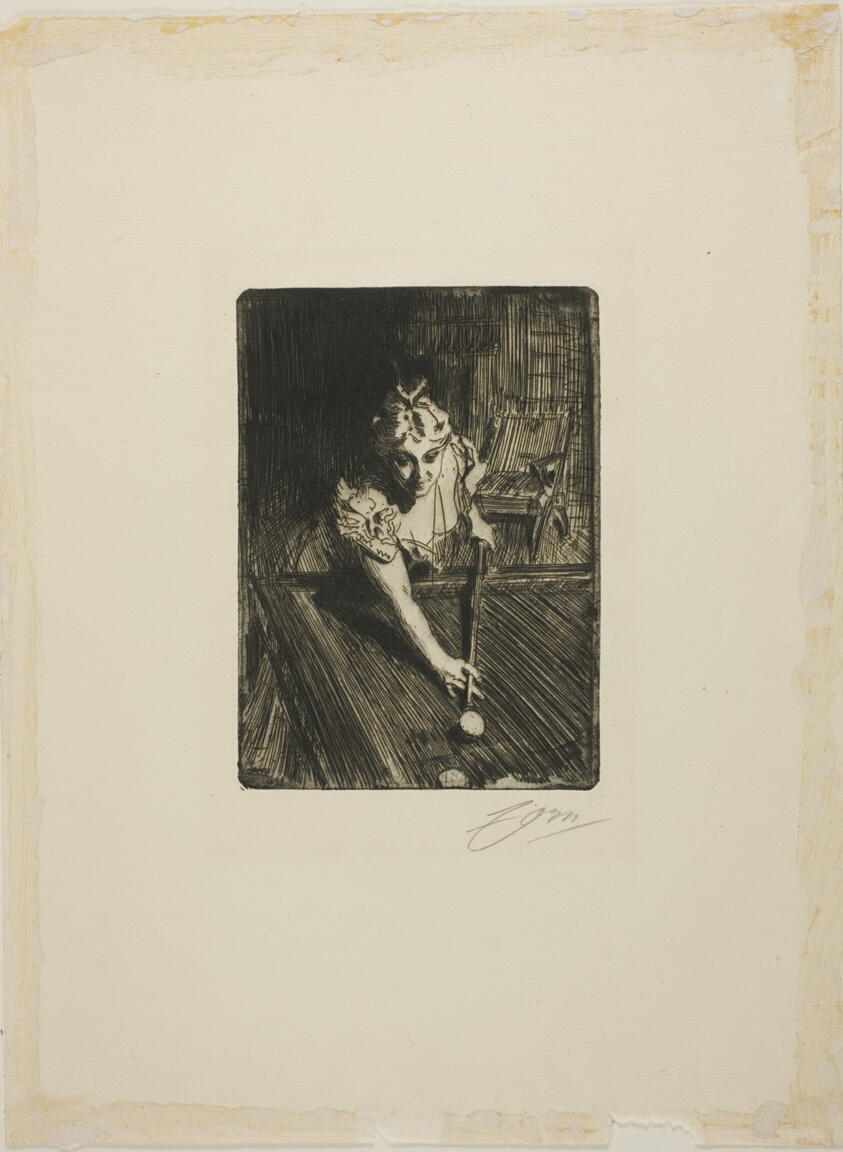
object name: Print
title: Billiards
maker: Anders Zorn (Swedish, 1860-1920)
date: 1898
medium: Etching on ivory laid paper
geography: Sweden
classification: etching; print; prints and drawing